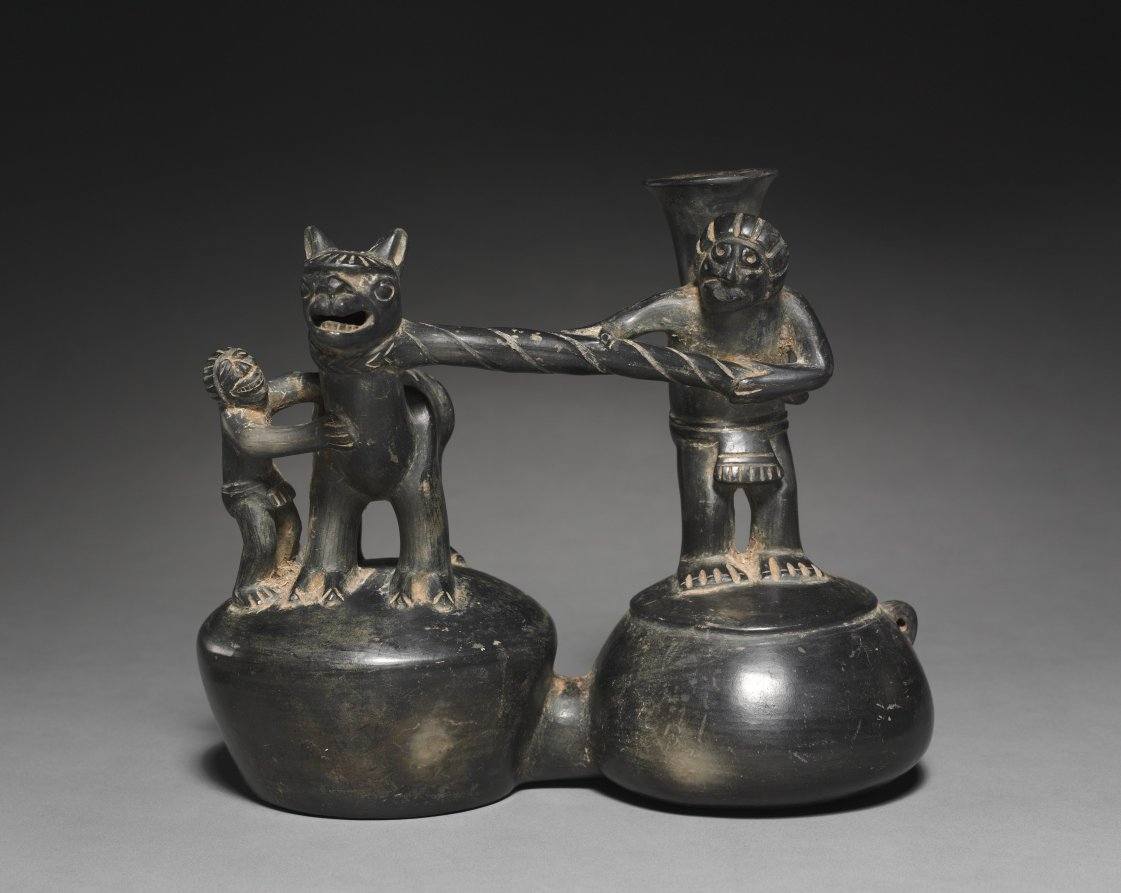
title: Double-chambered Vessel with Figures and Camelid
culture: Andes, Chimú-Inka, late 15th - mid 16th century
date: 1470–1532 (Thermoluminescence date, 1310–1610)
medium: ceramic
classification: Ceramic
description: Under the Chimú, ceramic seems to have been a less important artistic medium than for earlier north coast cultures. Accordingly, ceramics were mass-produced with molds and, rather than bearing painted scenes, often have an overall dark surface achieved by firing in a smoky atmosphere. The double-chambered vessel was made after the Inka conquered the Chimú in the 1460s.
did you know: When this vessel is filled with liquid and tilted back and forth, the camelid emits a whistling sound.